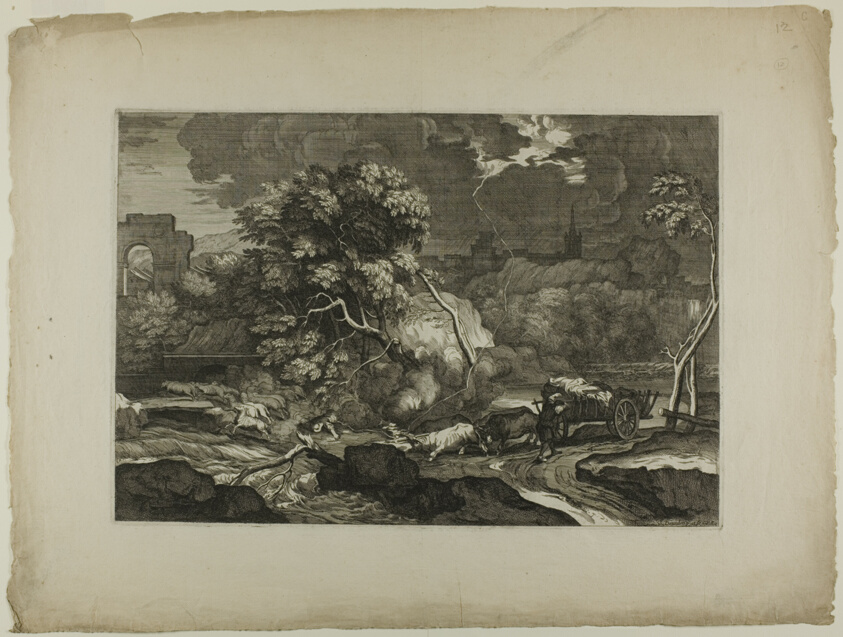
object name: Print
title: Cart Drawn by Two Pairs of Oxen in a Storm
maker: Sébastien Bourdon (French, 1616-1671)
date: 17th century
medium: Etching on ivory laid paper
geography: France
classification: etching; print; prints and drawing